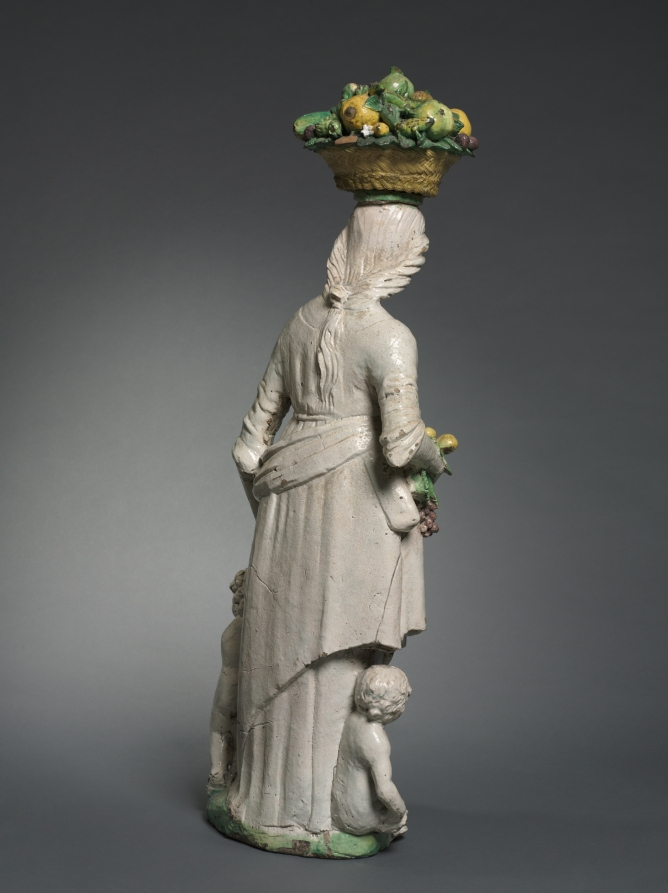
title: Dovizia (Plenty)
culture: Italy, Florence, 16th century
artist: Giovanni della Robbia (Italian, 1469–1529/30)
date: c. 1520–29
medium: glazed terracotta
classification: Sculpture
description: Many elite Florentine Renaissance homes had sculptures of idealized young women carrying nature’s bounty, such as this work. The motif stems from a statue by Donatello (about 1386–1466) that towered over Florence’s main public market. At home, however, the sculpture became a talisman for the family’s well-being. The city-state’s low birth rate was a serious political matter, and such a sculpture was believed to stimulate fertility while also promoting motherhood and bolstering financial success.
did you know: Inspired by an over life-sized, public sculpture by Donatello, Giovanni della Robbia reduced the figure for a domestic setting.